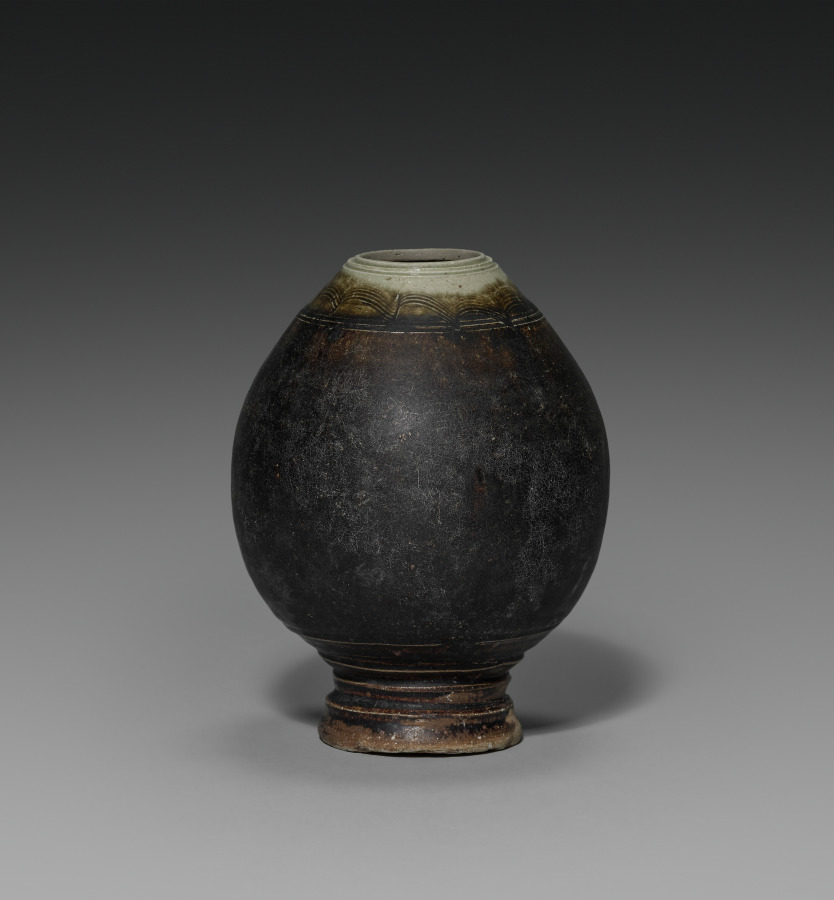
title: Jar in the Shape of a Fruit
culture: Cambodia, Northeast Thai kiln, Khmer Ware, Angkor Wat/Bayon period, 12th century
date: 1100s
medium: glazed pottery with brown slip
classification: Ceramic